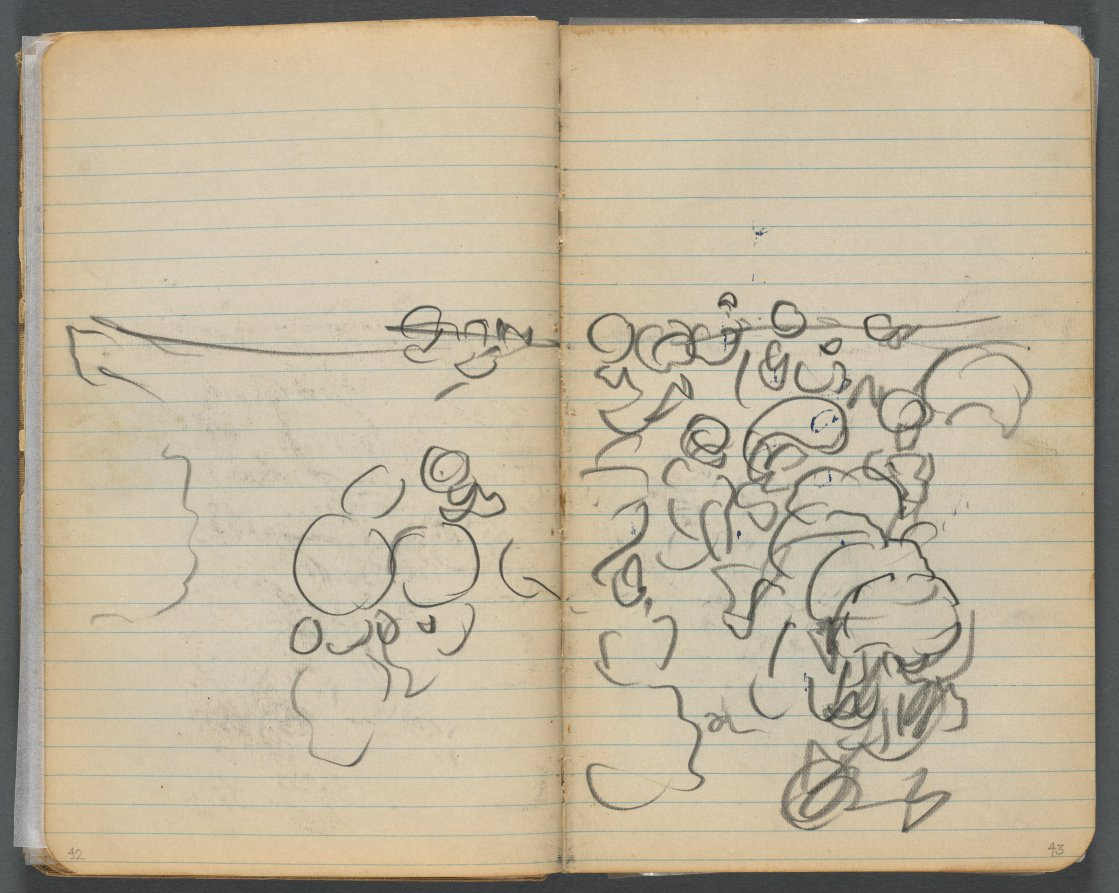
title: Sketchbook, page 042 & 43: Beach View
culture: America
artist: Maurice Prendergast (American, born Newfoundland [now Canada], 1858–1924)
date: 1905–10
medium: graphite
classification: Bound Volume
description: This sketchbook contains 69 pages of drawings, a diary largely devoted to the state of the artist's health, and a three-page discourse on the nature of genius and ideas.